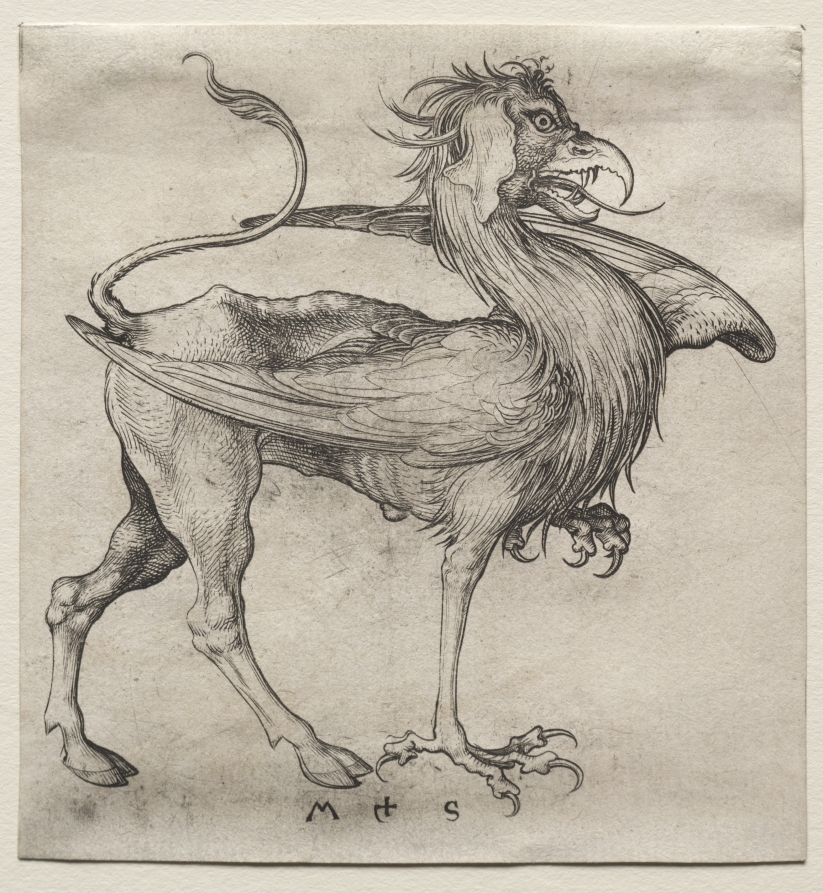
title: The Griffin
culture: Germany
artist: Martin Schongauer (German, c. 1450–1491)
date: c. 1480–90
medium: engraving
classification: Print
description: According to medieval bestiaries (books of beasts), the griffin is an imaginary and immensely dangerous creature, believed to carry off humans and oxen. Usually depicted with the body of a lion and the head, wings, and claws of an eagle, the griffin symbolizes both courage and vigilance. Its dual nature also signifies that of Christ himself: divine (bird) and human (animal). Martin Schongauer's griffin is an unusual combination of an eagle and an ox—see the back hoofed paws—departing from the traditional representation of this animal as part eagle and part lion. With a few bold strokes of the burin, Schongauer rendered in a naturalistic way the shape and texture of the feathers and fur of this fabled beast.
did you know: Compare Schongauer's griffin with two CMA sculptures of the same subject, once placed as guardian figures in the portal of an Italian Romanesque Christian church (1928.861.1 and 1928.861.2).